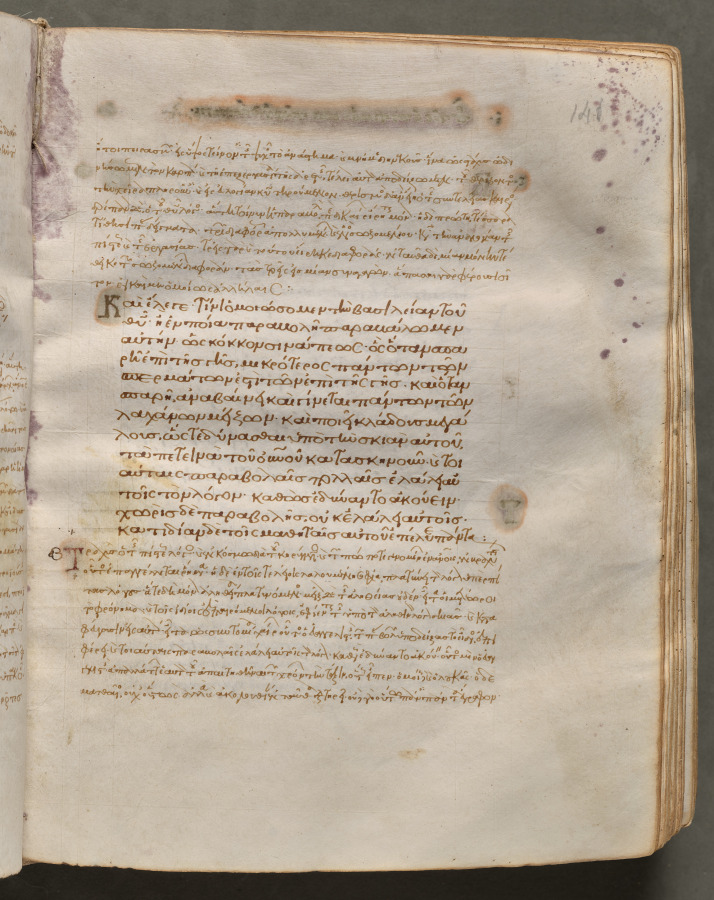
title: Text, folio 146 (recto), from a Gospel Book with Commentaries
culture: Byzantium, Constantinople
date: c. 1000–1100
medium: ink, tempera, and gold on vellum; leather binding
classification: Bound Volume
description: Each of the four gospels in this book opens on a page with brilliantly illuminated borders depicting the author of the text as well as birds-principally peacocks, symbols of the immortality of the soul-and fountains, representing the fountain of life and the salvation of the soul. This volume consists of 428 leaves with texts in Greek. Its level of sophistication suggests that it was probably written and decorated in a monastery in Constantinople.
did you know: Gospel Books were carried in procession through Byzantine churches.